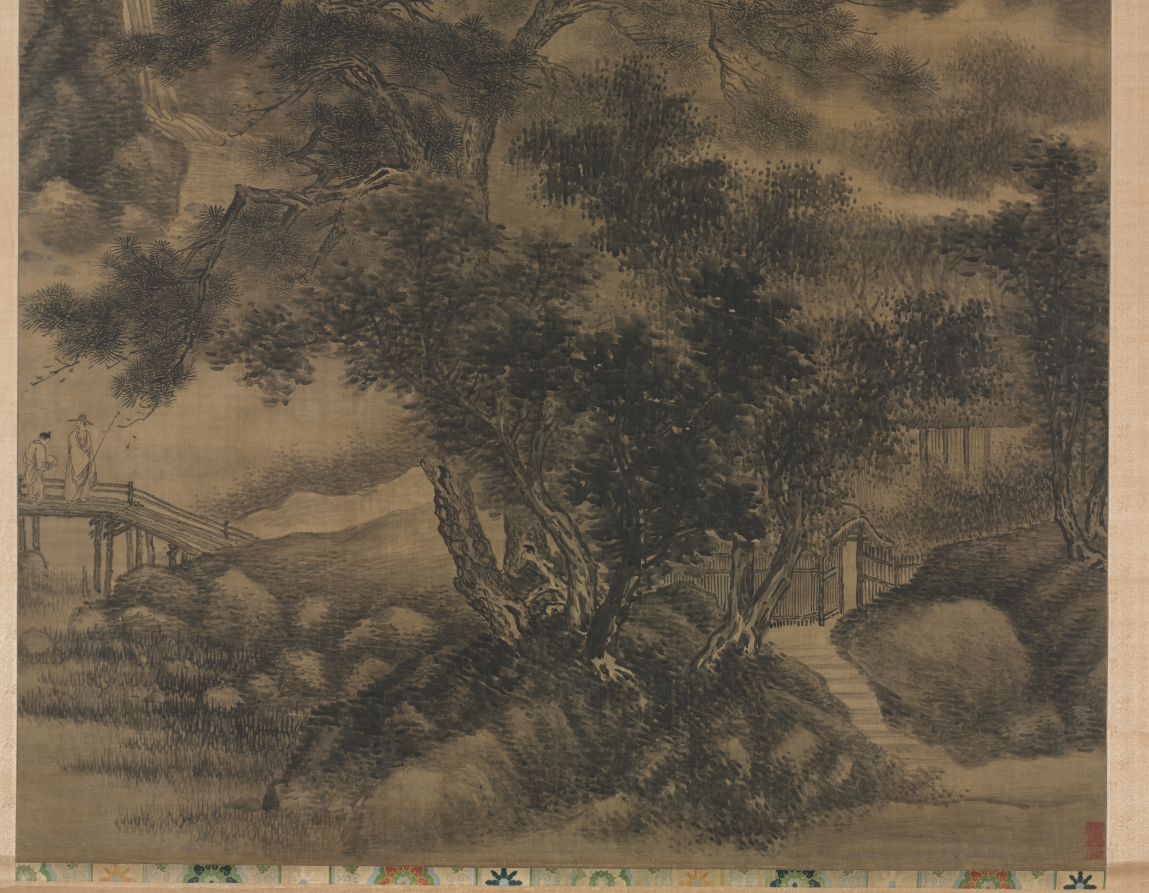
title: Clouds Visiting a Mountain Retreat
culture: China, Ming dynasty (1368–1644)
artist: Tao Hong (Chinese, active c. 1610–1640)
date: 1633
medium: Hanging scroll; ink on silk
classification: Painting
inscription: Artist's inscription, signature and two seals: Imitating Kao Fan-shan's [Kao K'o-kung's] brush at Liu-yün-ho [Valley of Lingering Clouds] during a spring day in the kuei-yu year [1633]. Yen-shan, T'ao Hung [seals] T'ao Hung chih-yin; tzu Ch'iu-shui. (Translated by Wai-Kam Ho)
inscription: 1 additional seal unidentified.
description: Little is known about Tao Hong who settled in Nanking in the latter part of his life. His son was a friend of the leading Nanjing school artist Gong Xian (on display nearby). When the Ming dynasty collapsed in 1644, Tao joined the loyalist resistance in Yunnan province. By 1645 the Manchu invaders had defeated the Yunnanese forces, prompting Tao to flee to Burma, where he died shortly thereafter. Only five of Tao Hong’s works are known to exist, of which this painting is the largest.